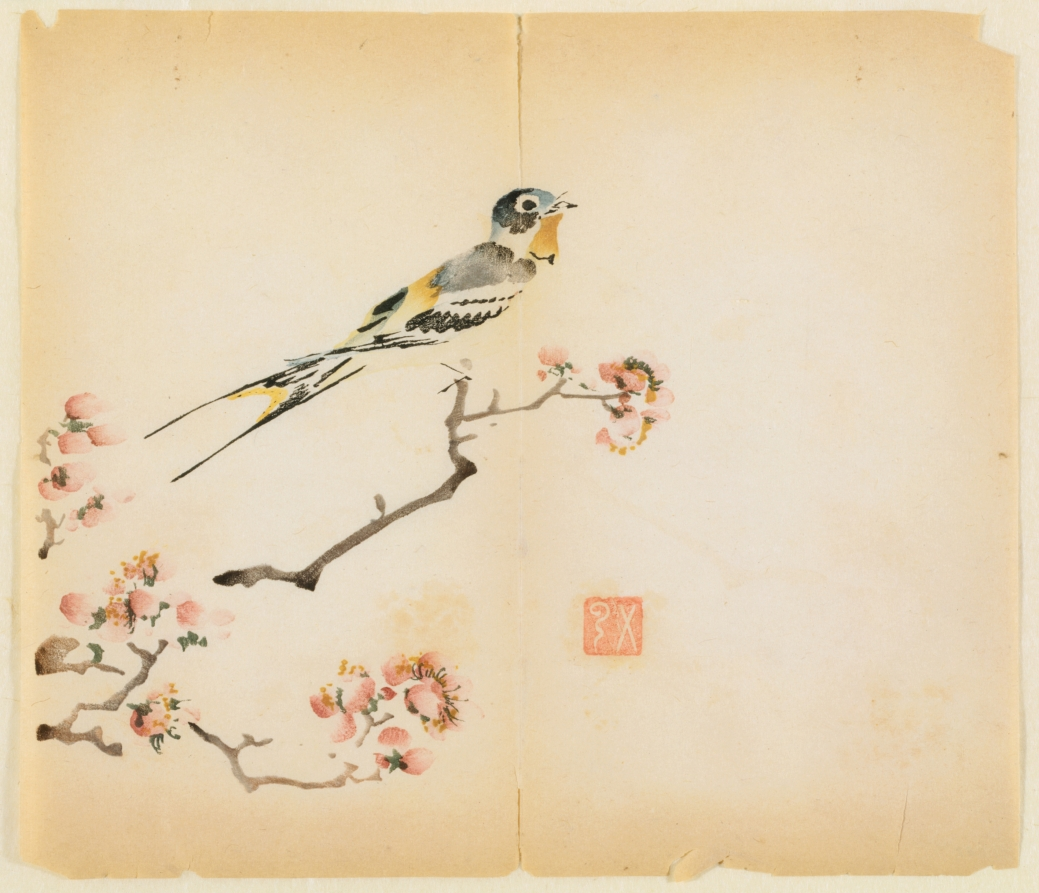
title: Swallow on Flowering Peach Branch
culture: China, Ming dynasty (1368-1644) or later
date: 1368–1644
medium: color woodblock print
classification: Print